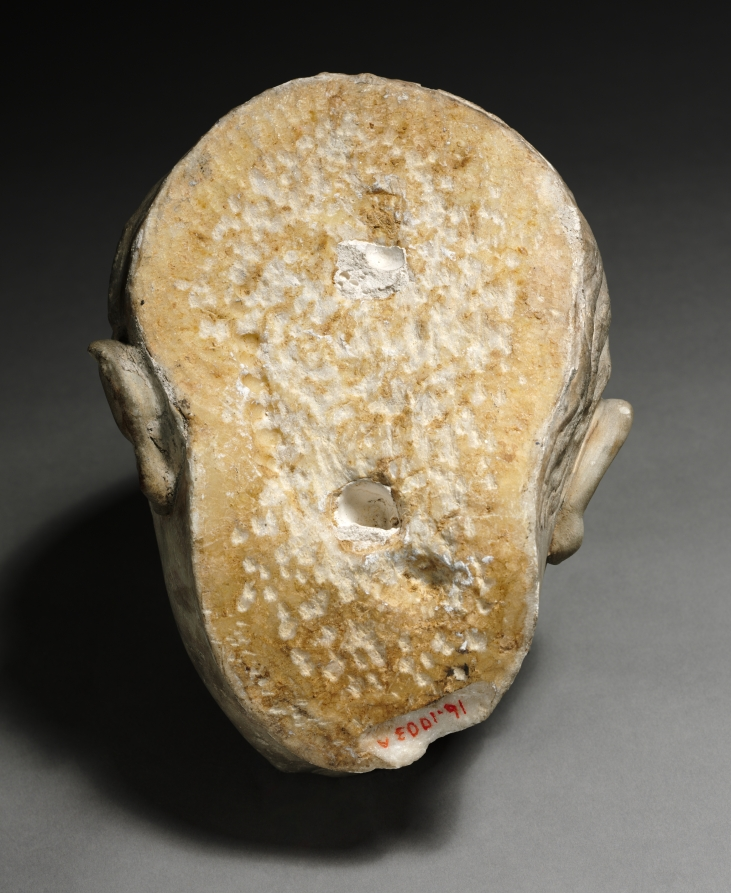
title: Bust of a Man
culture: Italy, Face: Roman, early 2nd century or later; Body: 16th century or later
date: Face: early 2nd century or later. Body: 1500s or later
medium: marble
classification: Sculpture